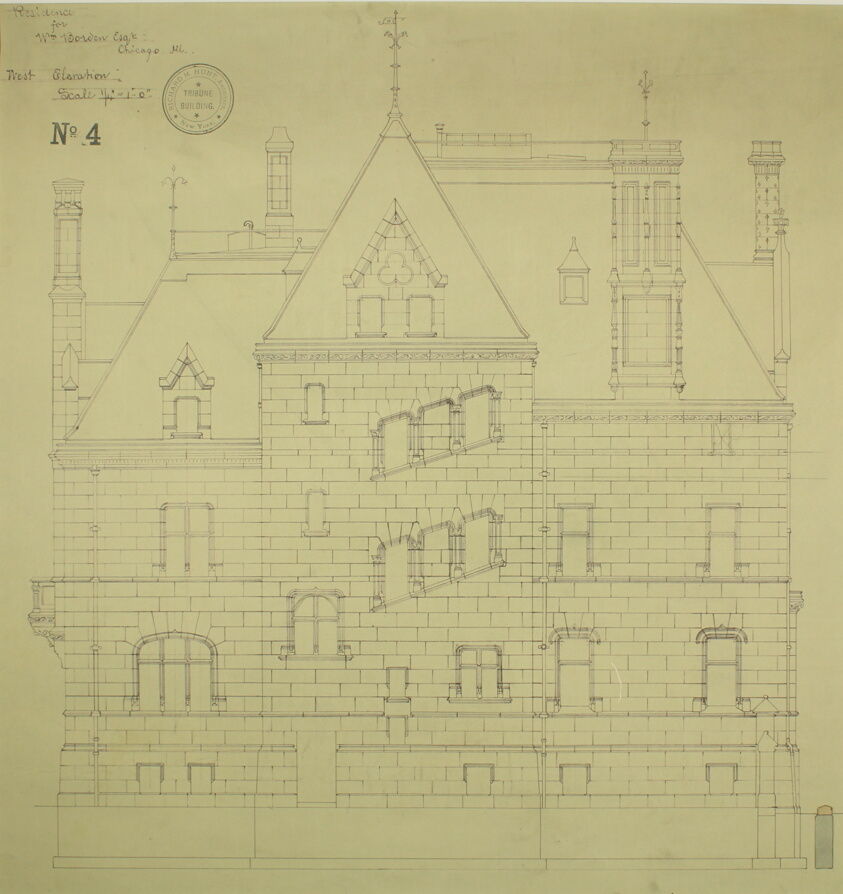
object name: Architectural Drawing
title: William Borden Residence, Chicago, Illinois, West Elevation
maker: Richard Morris Hunt (American, 1827-1895)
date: 1885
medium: Watercolor on hectographic print, mounted on linen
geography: Chicago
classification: working drawing; architectural drawing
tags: Chicago